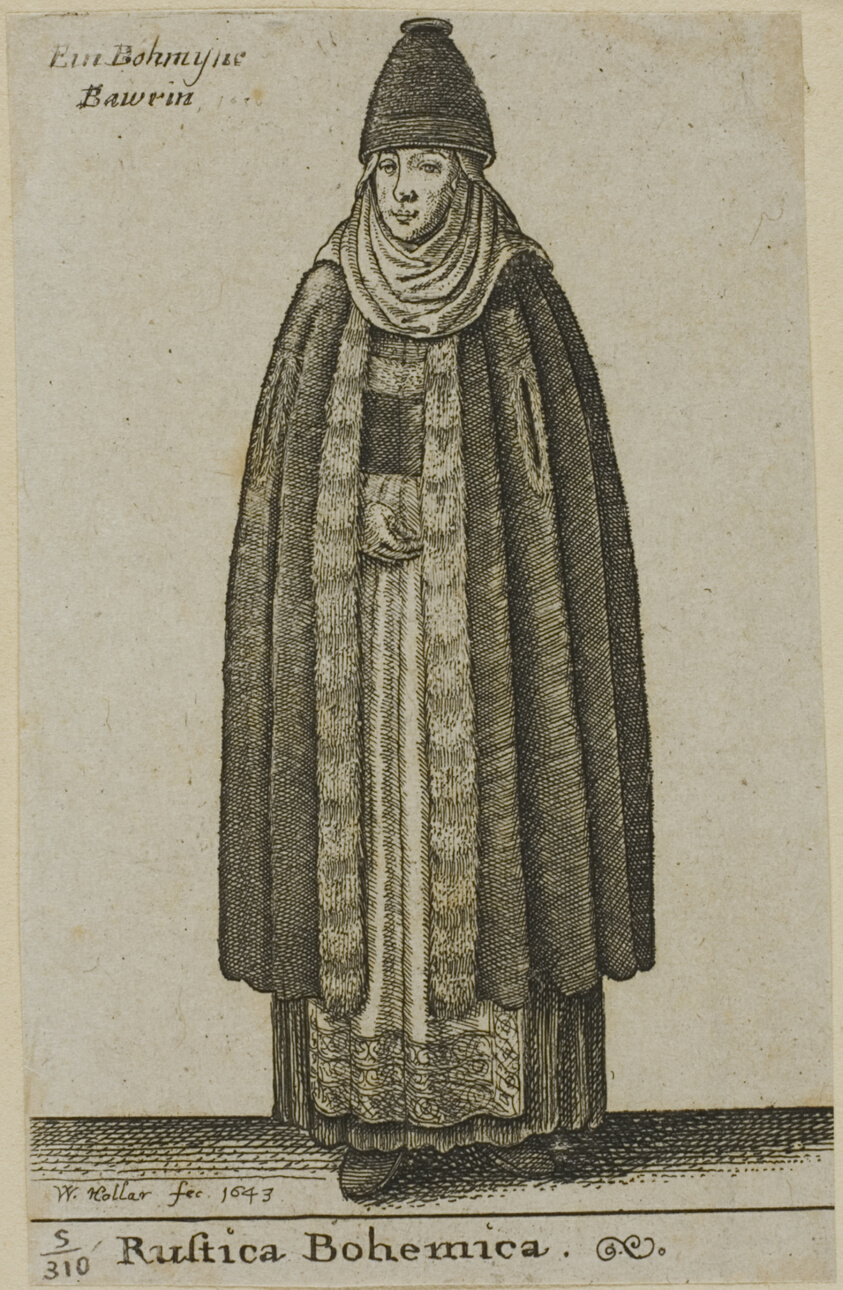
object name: Print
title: Peasant Woman from Bohemia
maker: Wenceslaus Hollar (Bohemian, 1607-1677)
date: 1643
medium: Etching on gray Asian paper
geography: Bohemia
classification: etching; print; prints and drawing